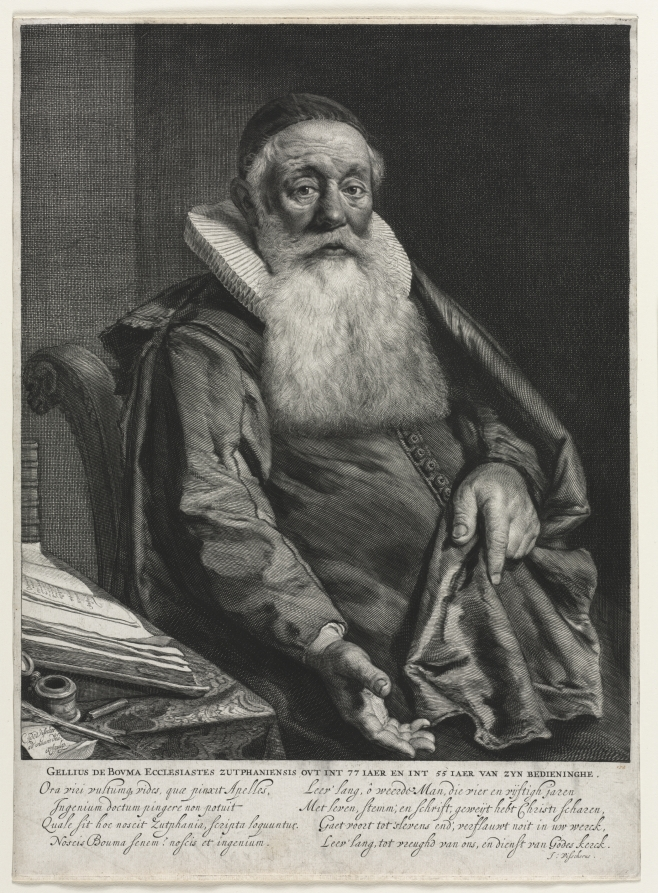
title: Gellius de Bouma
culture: Netherlands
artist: Cornelis de Visscher (Dutch, 1628/29–1658)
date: c. 1656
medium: engraving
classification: Print